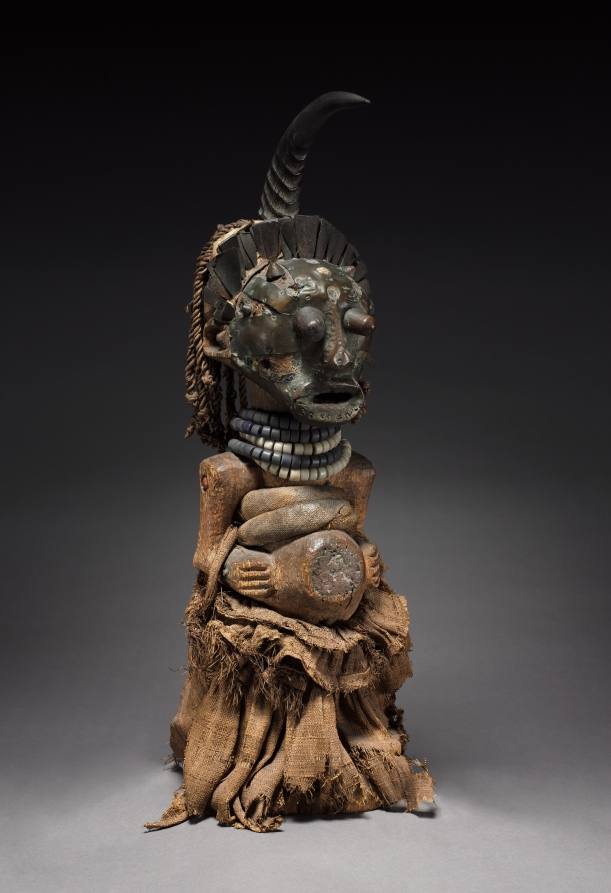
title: Male Figure (nkishi)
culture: Africa, Central Africa, Democratic Republic of Congo, Songye-style carver and nganga (priest)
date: late 1800s–early 1900s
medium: Wood, glass beads, brass (including upholstery studs), copper alloy, iron alloy, raffia, reedbuck antelope horn, rawhide, animal hair, human teeth, organic material, minerals, and plant fibers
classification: Sculpture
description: This figure's visual impact and workmanship suggest that an extended family––rather than an individual––used it. The raffia skirt around the waist and the blue and white beads are indicators of leadership. The metal appliqué covering the face and the metal blades that hedge the headgear refer to the blacksmith, a culture hero celebrated in a Songye myth narrating the formation of the state. The metal strips on the skeletal face are said to relate to lightning, signaling the figure's role as a powerful anti-sorcerer, but the contrast between white iron and red copper symbolically alludes to the ambivalent powers of the figure.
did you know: Researchers conducted X-ray scanning on this figure, revealing its internal structure and human teeth, an antelope horn, and animal hair.